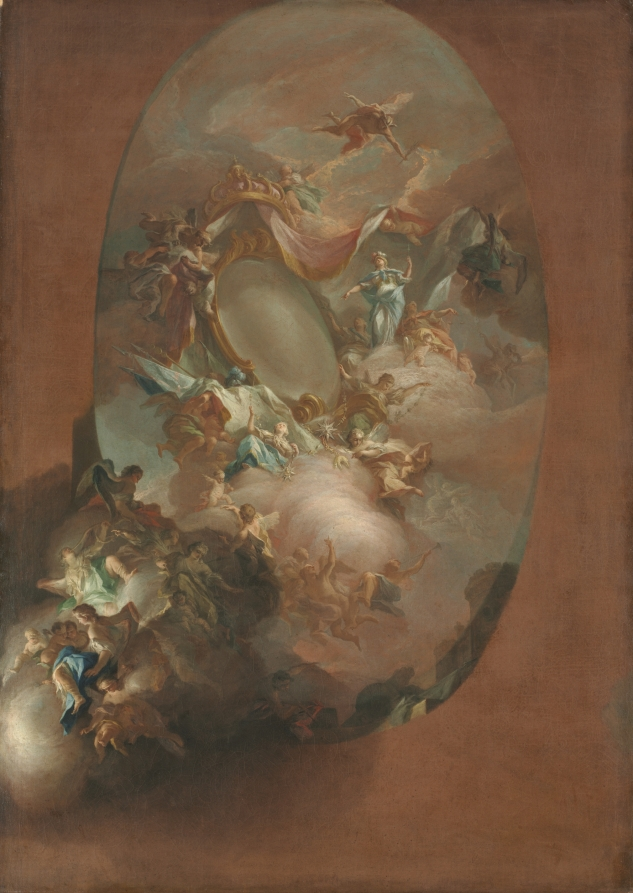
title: Study for "The Apotheosis of Ferdinand IV and Maria Carolina, King and Queen of Naples" (for the Palazzo dei Regi Studi, Naples)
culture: Italy, 18th century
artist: Pietro Bardellino (Italian, 1728–1810)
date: c. 1781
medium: oil on canvas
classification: Painting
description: This large oil painting was thought to be an early, rough sketch for the ceiling of the Salone de Biblioteca Antica in the Palazzo degli Studi in Naples. The attribution to Bardellino was based on the sketch's similarity to another sketch by the artist, sold in New York in 1972, which is more closely related to the ceiling painting. It is assumed that the Cleveland work preceded the more finished oil sketch and that both models were created in preparation for the Palazzo degli Studi's Apotheosis, completed in 1781. The Cleveland sketch was almost completely altered in the final composition. The cartouche, or grouping of regal paraphernalia, which is the main feature of the Cleveland sketch, was omitted in the final ceiling painting. This medallion conveys the idea that the reign of the royal couple is filled with fortune. Bardellino used atmospheric colors and his delicate touch in this heavenly vision of angels and virtues, and the angels hold a chain bearing the orders of the royal family. From left to right are the Order of San Januarius, the Order of the Holy Spirit of France, the Order of the Golden Fleece (represented by the lamb), and the Order of St. George of Constantine. The large oval shape, empty in the Cleveland sketch, also appears in the final version, where the oval is smaller and frames a portrait of Ferdinand and Maria. Rather than representing an apotheosis of the bodies of the royal couple, Bardellino shows their ascent in the raising of their portraits to heaven. While the Palazzo degli Studi painting differs greatly from the Cleveland version, the oval space in the Cleveland sketch suggests Bardellino's plans for the inclusion of the royal portrait in the final ceiling painting.